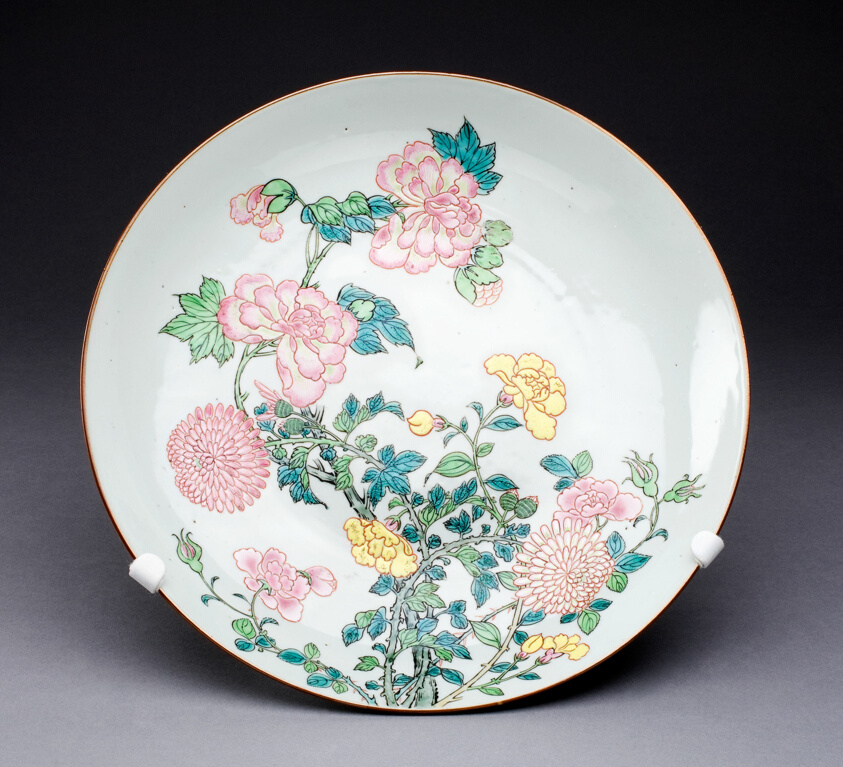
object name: Ceramics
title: Dish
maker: China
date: c. 1725, Qing Dynasty (1644–1911), Yongzhen period (1723–1735)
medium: Hard-paste porcelain and polychrome enamels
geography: China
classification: dish (vessel); ceramics